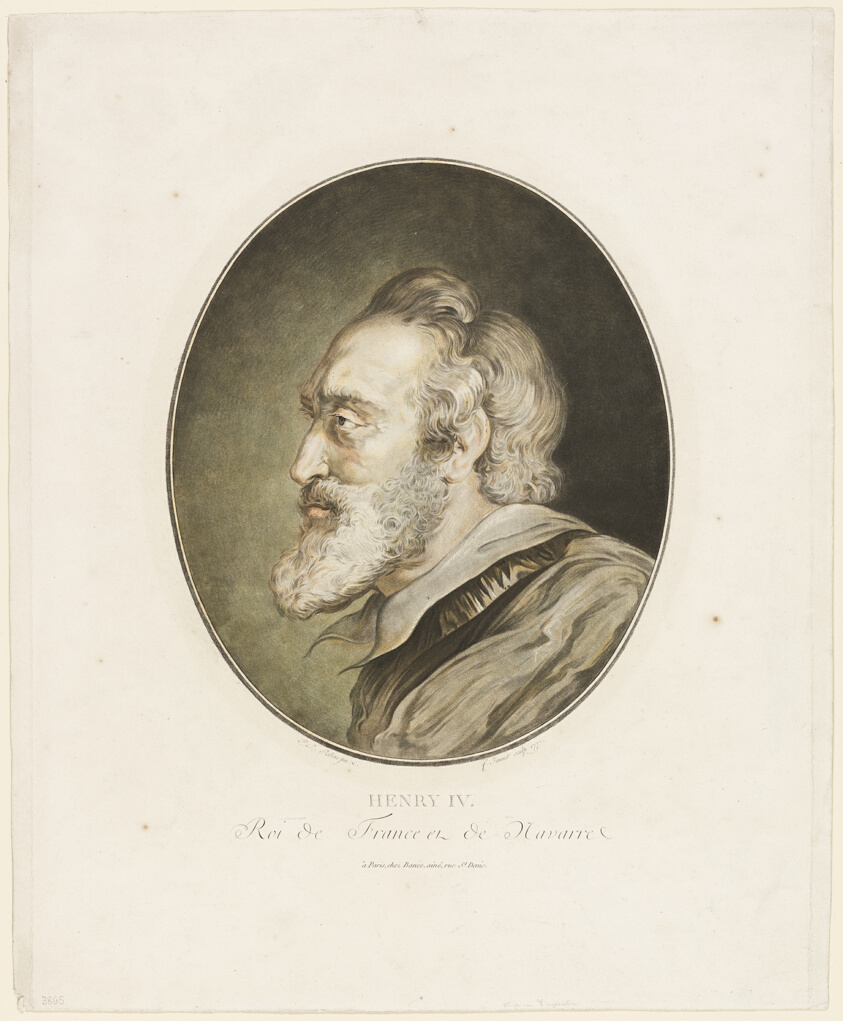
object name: Print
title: Henry IV, King of France and Navarre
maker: Jean-François Janinet; French, 1752-1814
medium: Color aquatint on paper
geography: France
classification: aquatint; print; prints and drawing